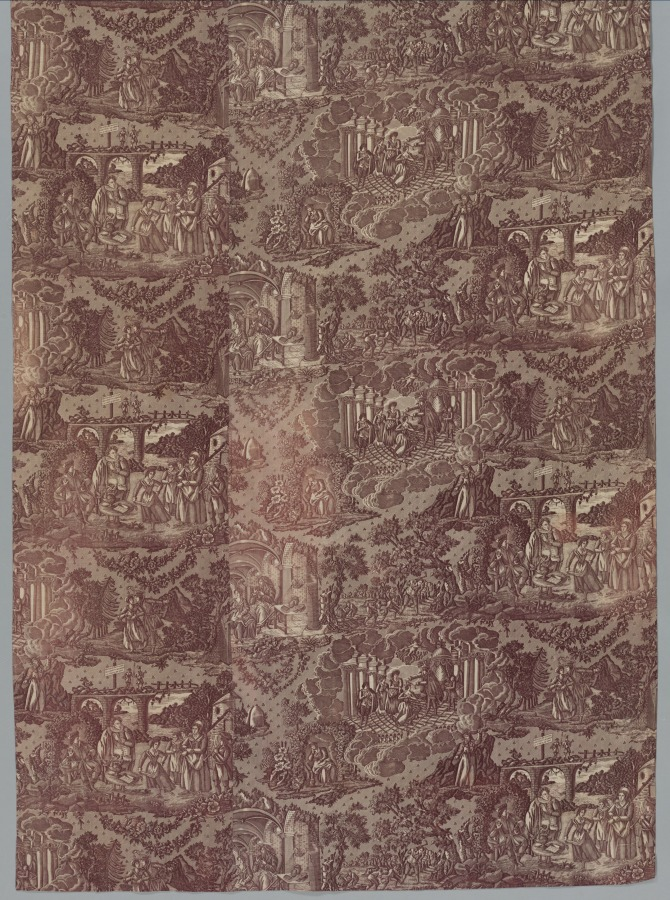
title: "La Treve de Dieu" (The Truce of God)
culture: France, Nantes or Rouen ?, early 19th century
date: c. 1825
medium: copperplate printed cotton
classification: Textile